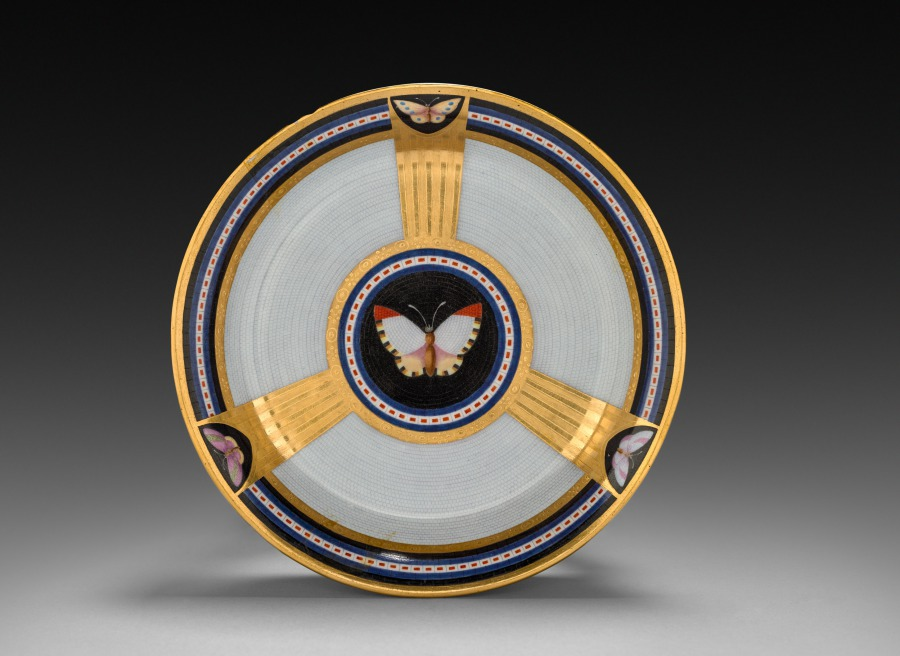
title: Saucer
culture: Austria, Vienna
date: c. 1800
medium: porcelain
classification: Ceramic